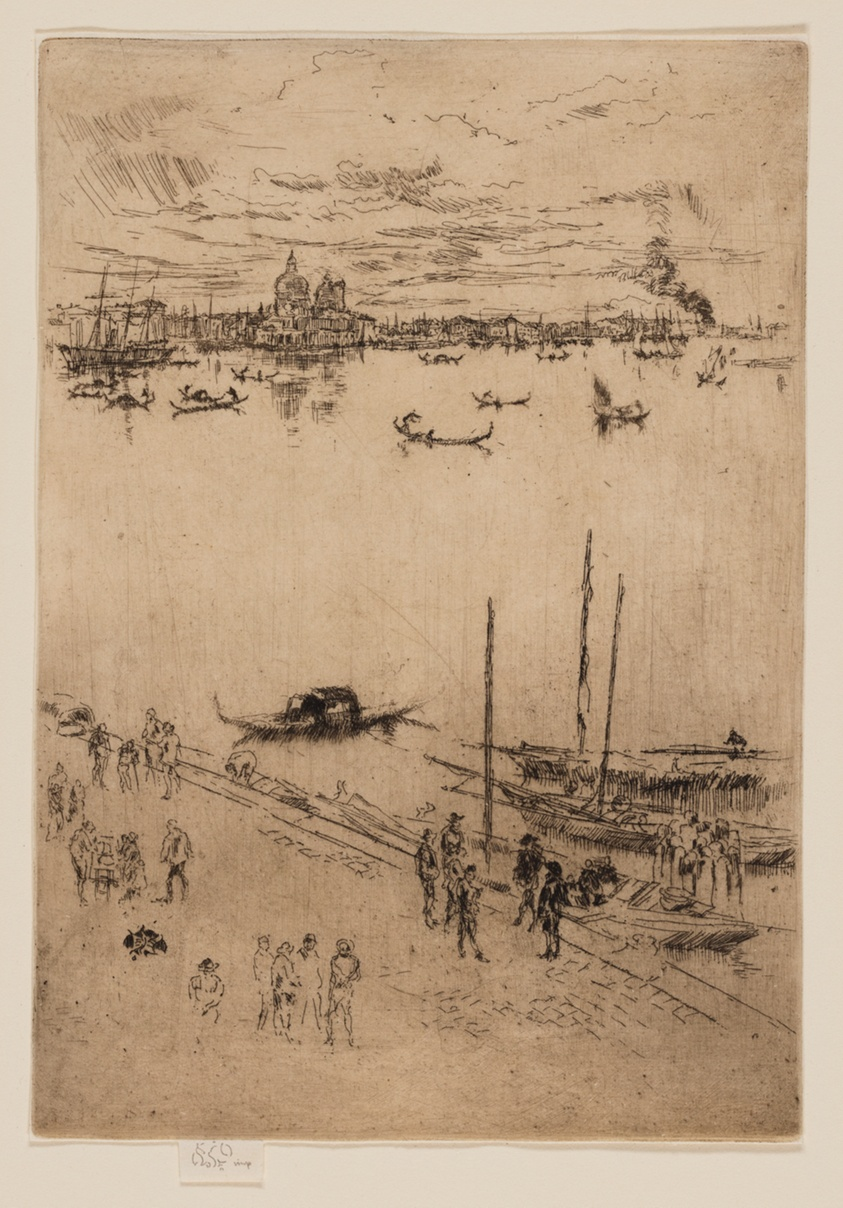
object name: Print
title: Upright Venice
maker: James McNeill Whistler (American, 1834-1903); published by Dowdeswell and Dowdeswell (English)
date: 1879/80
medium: Etching and drypoint with foul biting in black ink on off-white laid paper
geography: United States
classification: etching; foul biting; print; prints and drawing; drypoint; paper